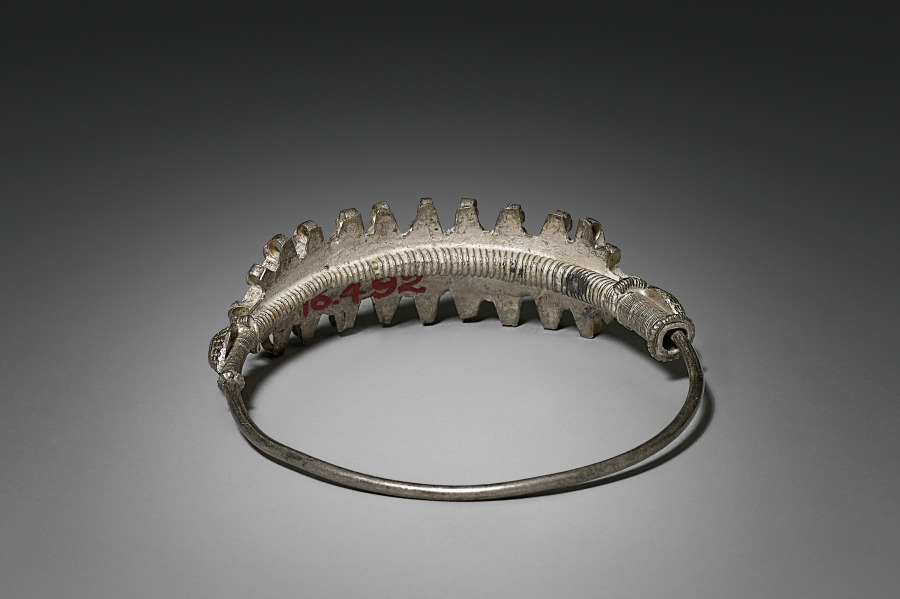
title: Nose Ring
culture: India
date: early 1900s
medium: silver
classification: Jewelry